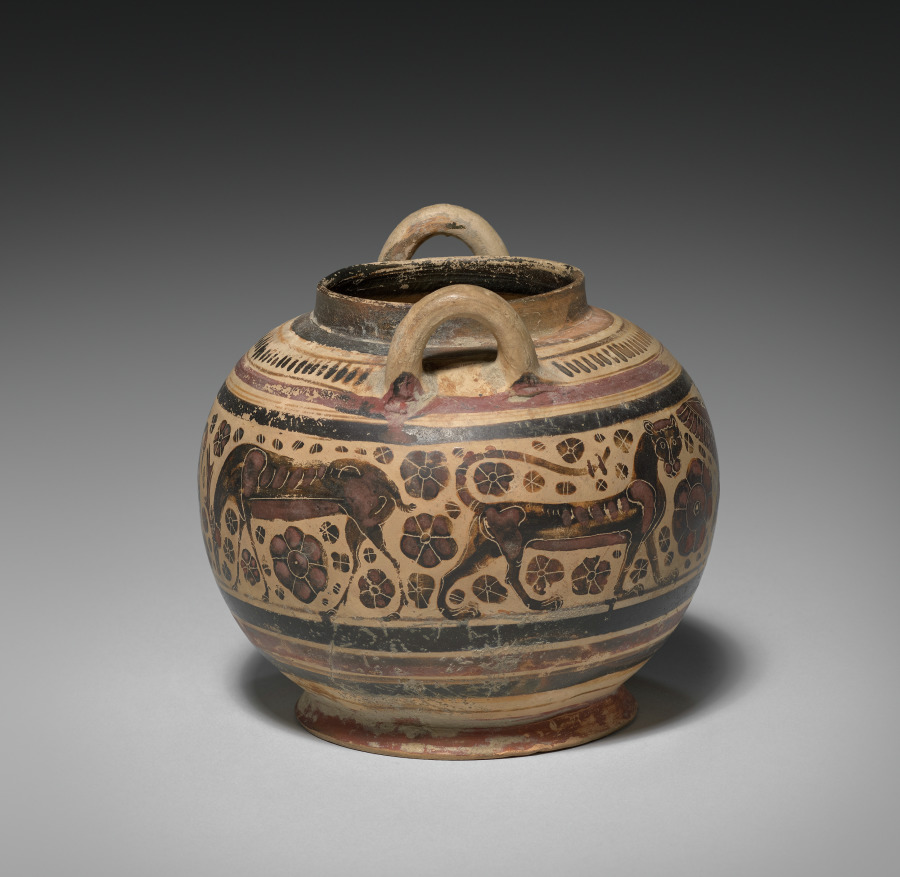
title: Corinthian Vase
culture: Greece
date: 600s BCE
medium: earthenware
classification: Ceramic